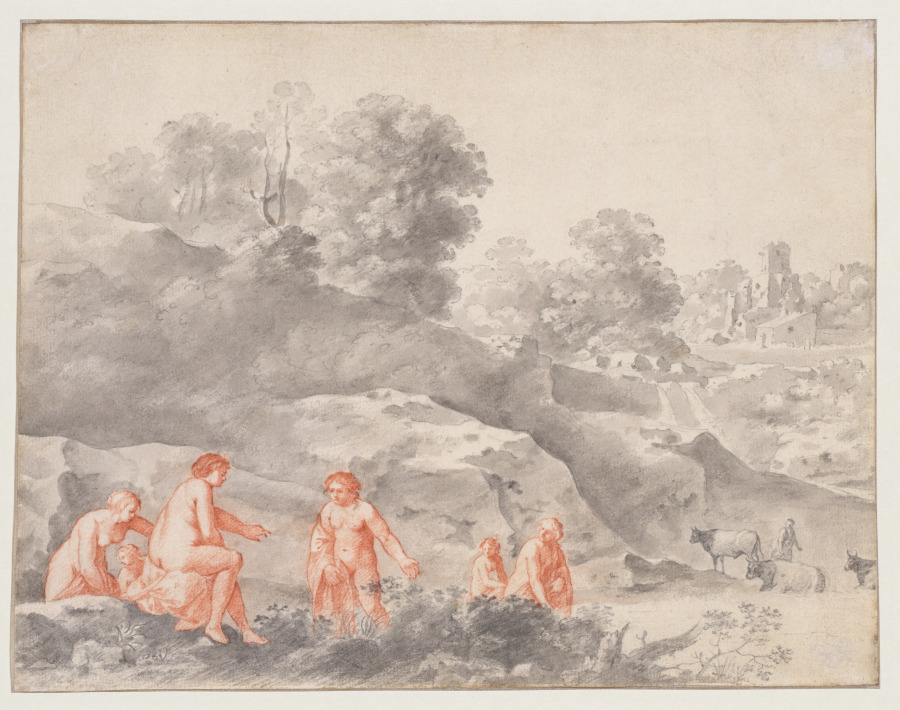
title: Nudes in a Landscape (possibly Diana and Callisto)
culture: Netherlands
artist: Cornelis van Poelenburch (Dutch, 1594/95–1667)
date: c. 1642–67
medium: black ink wash over graphite, and red chalk on cream antique laid paper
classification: Drawing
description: In this drawing, the Amsterdam painter Cornelis van Poelenburch combined a loose, monochromatic ink wash landscape with red chalk figures in the foreground. The figures depict the story of Diana and Callisto, when Callisto’s pregnancy with Jupiter's child is revealed to the chaste goddess of the hunt Diana. Van Poelenburch began to draw with red chalk during a journey to Italy, where it was a more common artist’s medium than in the Netherlands. Back in Amsterdam, he kept red chalk as part of his practice, perhaps to call attention to his Italian sojourn.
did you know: The artist first drew the figures in red chalk and then meticulously filled in the ink wash landscape around them.